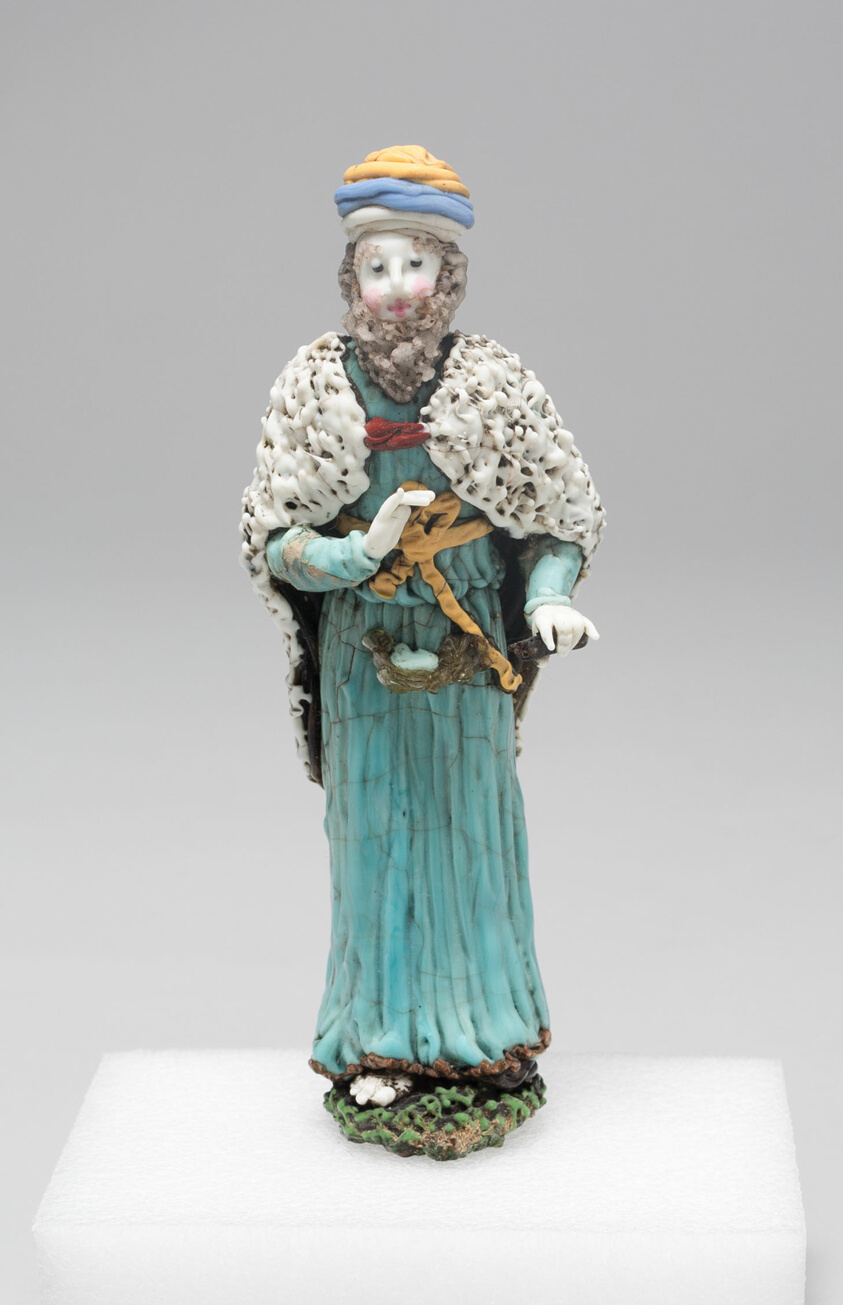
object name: Glass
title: Old Man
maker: Nevers, France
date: Early 18th century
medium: Glass; lampwork (verre de Nevers), metal armature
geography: France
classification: decorative object/ornament; lampwork; glass; european decorative arts